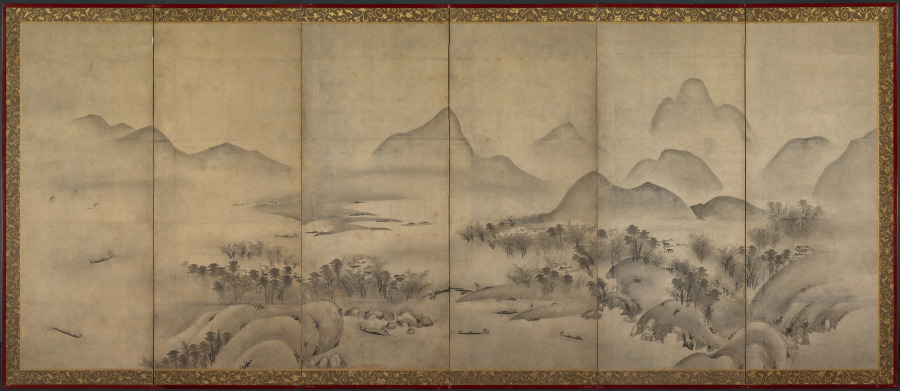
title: Moonlit Landscape (one of a pair)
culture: Japan, Muromachi period (1392–1573)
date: late 1500s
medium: six-panel folding screen, ink on paper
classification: Painting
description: This unsigned and unsealed composition includes imagery from the Eight Views of the Xiao and Xiang Rivers. Scanning the composition from right to left, four of the Eight Views subjects appear: sunset glow over a fishing village, returning sails off a distant shore, autumn moon over Lake Donting, and evening bell from a mist-shrouded temple. Not all the elements of the traditional Eight Views theme are here, but the artist suggests its literary presence by leading the viewer through a summer’s journey from one day to the next, aided, like the travelers in the landscape, by the light of the moon.